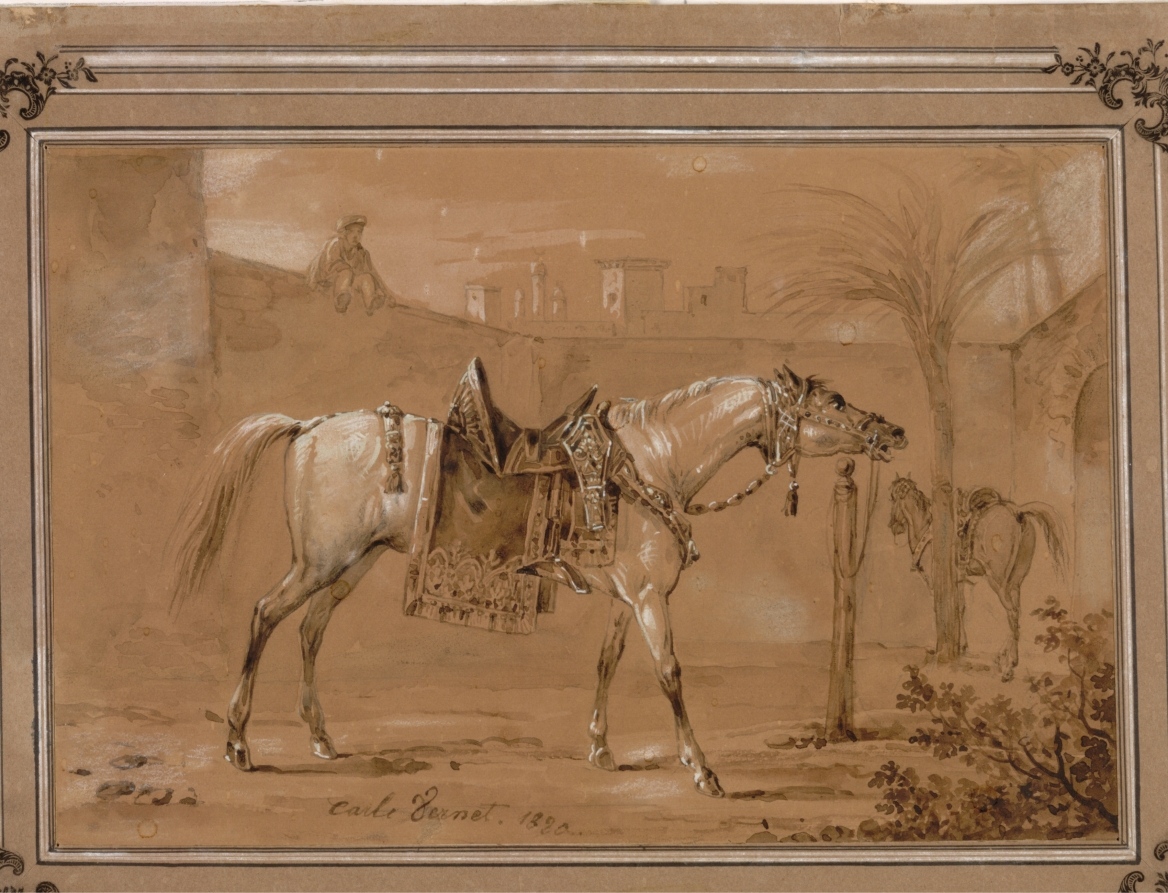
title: Saddled Arabian Horse in Courtyard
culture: France, 19th century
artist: Carle Vernet (French, 1758–1836)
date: 1820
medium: pen and brown ink, brown wash, with gray wash, over black chalk or crayon, heightened with white gouache and white chalk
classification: Drawing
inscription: signed, lower left, in brown ink: Carle Vernet. 1820.; verso of secondary support, upper right, in graphite: super duper; lower center, in graphite: russian stamp [sideways] / [arrow]; lower right, in graphite: #6 [circled].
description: While his father, Joseph, was known for marine paintings, and his son, Horace, became a celebrated Romantic artist, Carle Vernet excelled in representing battles and animals, especially horses. Vernet was an expert rider himself, and in his pictures he precisely described various breeds and horse dressings. Although the artist never traveled further from France than Italy, his drawing of an Arabian horse contains elements that make it seem as if he observed the animal in its native environment. He documented the unique saddle and included exotic architecture in the background and palm trees at the right. Vernet was able to study exotic breeds and costumes in Paris, both in the military corps and at the horse races.